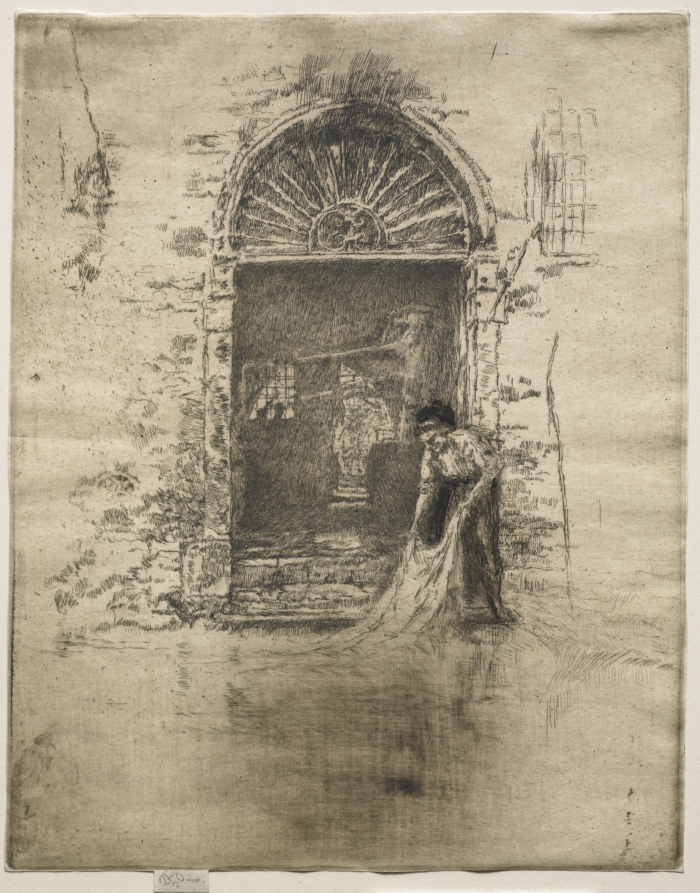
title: The Dyer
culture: America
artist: James McNeill Whistler (American, 1834–1903)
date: 1879–80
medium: etching and drypoint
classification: Print